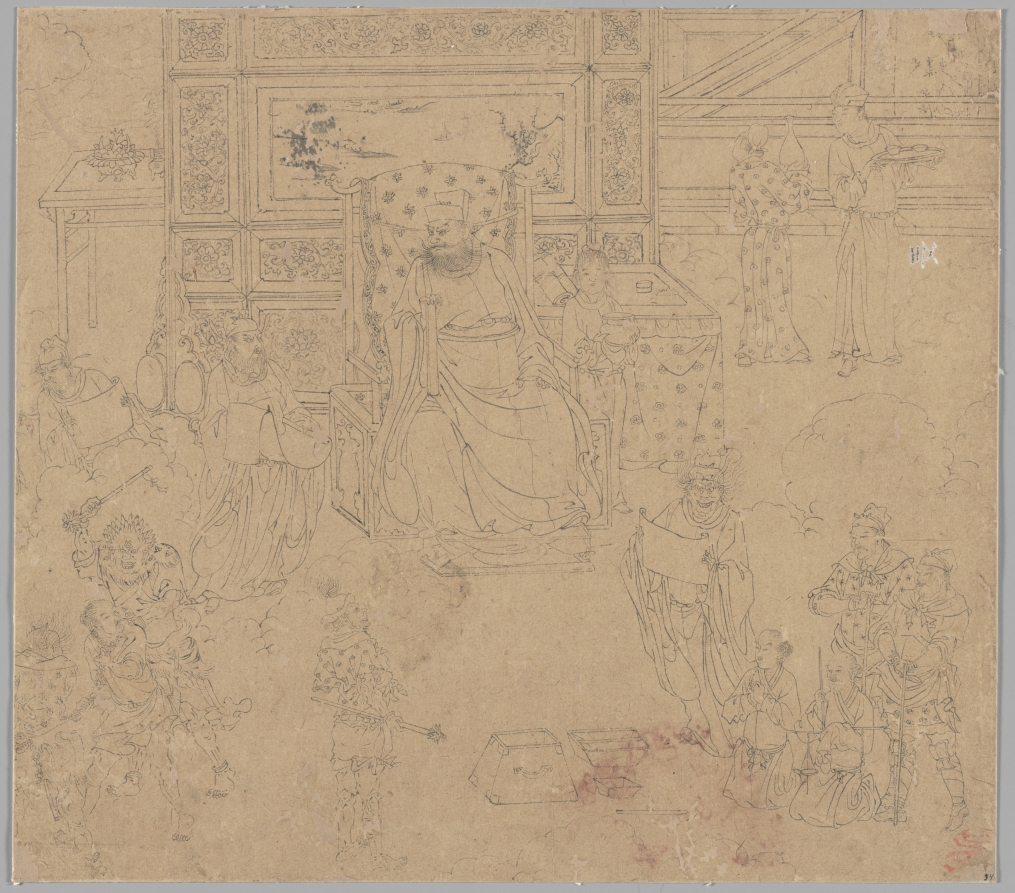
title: Album of Daoist and Buddhist Themes: Kings of Hells: Leaf 34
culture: China, Southern Song dynasty (1127-1279)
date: 1200s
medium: Album, ink on paper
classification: Painting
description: This extraordinary album has 50 paintings on a variety of religious subjects. They were likely created by several master craftsmen to share with studio apprentices as models for fulfilling commissions. The Jade Emperor and the Daoist pantheon make up the first 26 leaves. The next 14 leaves portray the Buddhist Ten Kings of Hell administering punishments to the dead. The third section, called “Clearing the Mountains,” features divine soldiers, led presumably by the deity Erlang Shen 二郎神, fighting undesirable creatures.